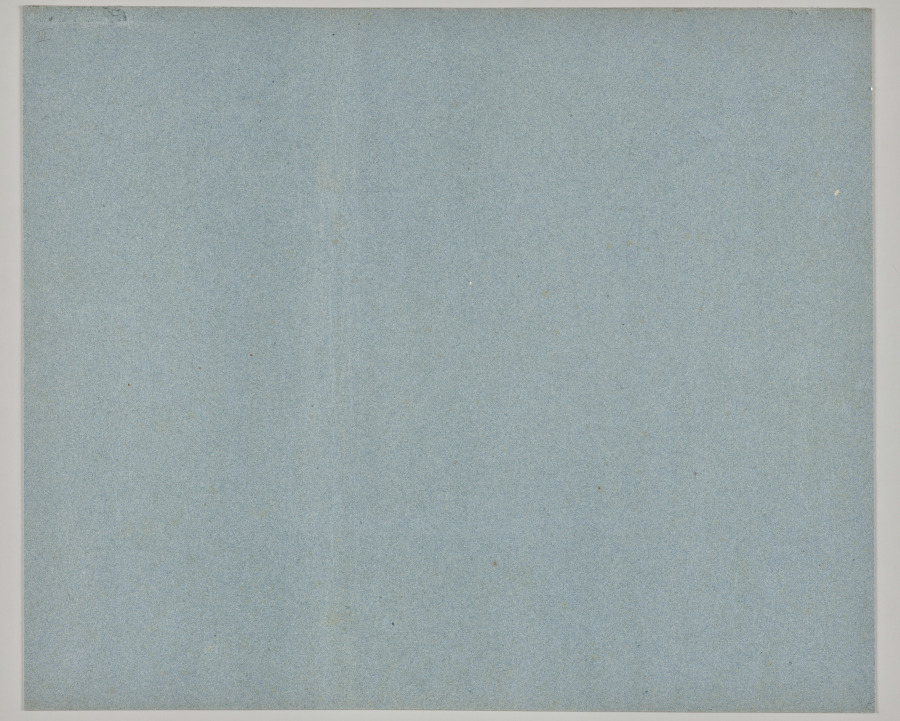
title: Wednesday. Footpath on the Mönchsberg near Salzburg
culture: Germany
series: Seven Areas from Salzburg and Berchtesgaden. Arranged according to the seven days of the week, connected by two allegorical sheets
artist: Ferdinand Olivier (German, 1785–1841)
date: 1818–23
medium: lithograph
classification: Print